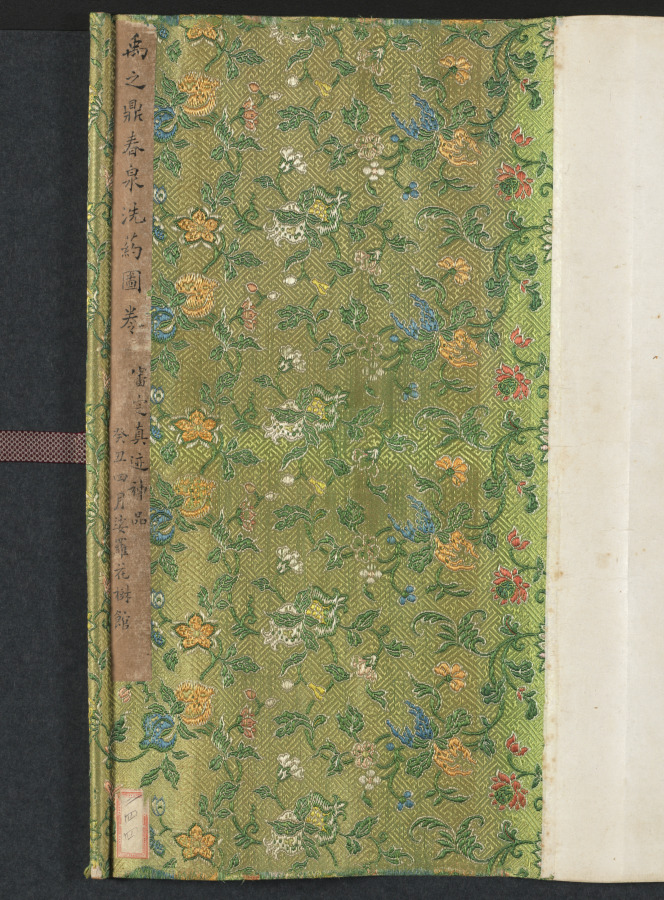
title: Cleansing Medicinal Herbs in the Stream on a Spring Day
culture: China, Qing dynasty (1644-1911)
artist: Yu Zhiding (Chinese, 1647–c. 1716)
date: 1703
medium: Handscroll; ink and color on silk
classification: Painting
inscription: Title by Chen Yixi.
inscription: 姑射仙人冰雪膚，新詩傳唱滿通都。/ 極知遲暮難為別，更展春泉洗藥圖。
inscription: Colophon by Chen Tingjing 陳廷敬 (1639–1712). Colophon by Wang Hongxu 王鴻緒 (1645–1723), dated 1707. Colophon by Song Luo 宋犖 (1634–1714). Colophon by Liu Yan 劉巗. Colophon by Jing Xikui 涇西夔. Colophon by Liu Yan 劉巗. Colophon by Cao Yin 曹寅. Colophon by Wang Shihong 汪士鋐. Colophon by Wang Shidan 王式丹 (1645–1718), dated 1712. Colophon by Shi Shenyi 史申義 (1661–1712), dated 1712. Colophon by Yin Yuqing 殷餘慶, dated 1712.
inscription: Colophon by Chen Shixia 陳時夏, dated 1729.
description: A famous portraitist, Yu Zhiding here depicts the likeness of Shi Shenyi 史申義 (1661–1712), an official and poet. Master Shi, a sickly man, was deeply interested in medicinal science. The opening section of the scroll features a boy washing a fungus in fresh spring water, a basket of medicinal herbs by his side. Other servants carry a fan, a bundle of scrolls, and a cup of tea or hot wine. Master Shi sits in a bamboo grove, surrounded by fields of herbs. Returning swallows, pink peach blossoms, and blooming magnolia indicate spring, whereas the fungus conveys wishes for long life. The spring theme may express the artist’s wish for his friend’s recovery.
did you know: In the pavilion are some of Shi Shenyi’s scholarly accoutrements: a stack of books, an antique zun 尊 (wine vessel), a brush holder, an ink stone, and a small chime.